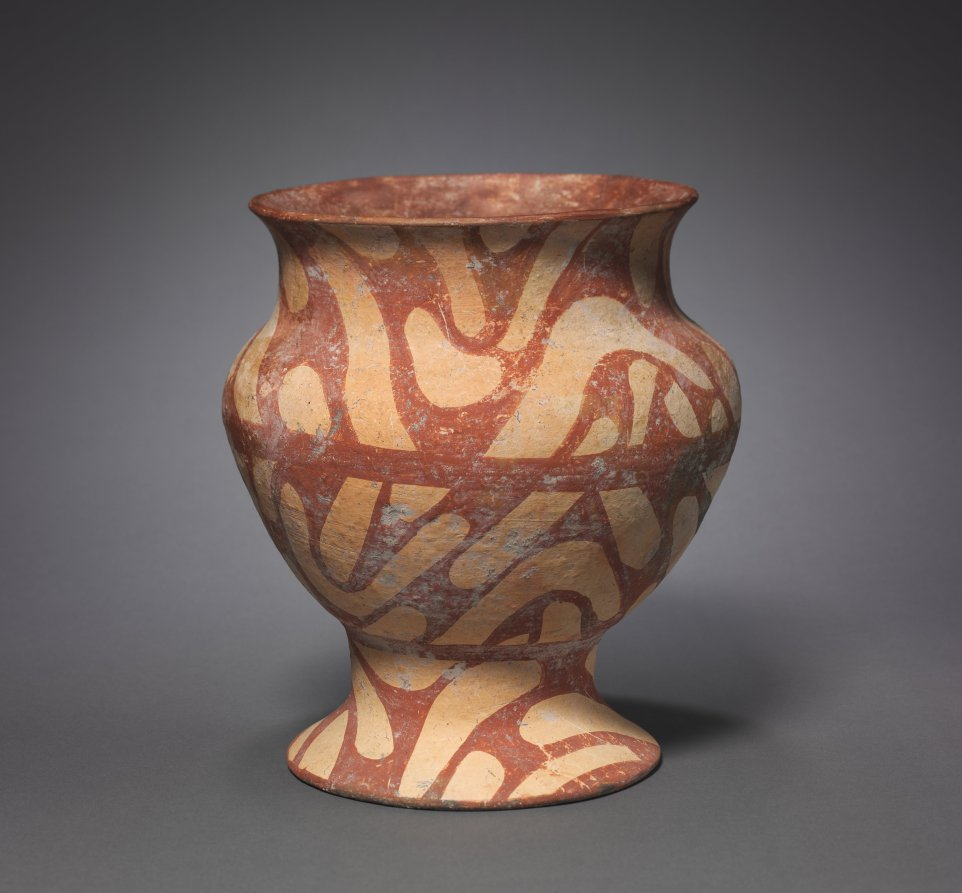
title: Jar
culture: South East Asia, Thailand, Ban Chiang, Neolithic period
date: 3000 BCE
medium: earthenware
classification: Ceramic